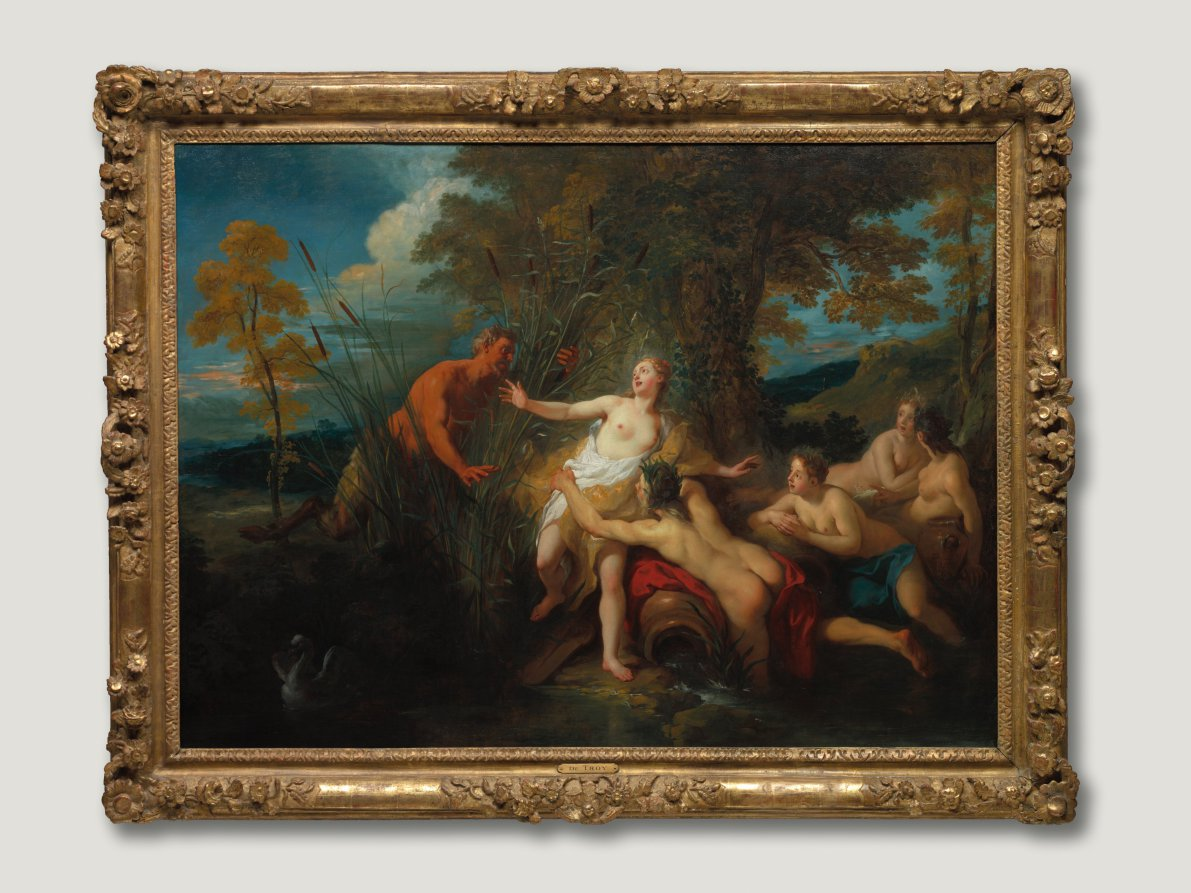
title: Pan and Syrinx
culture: France, 18th century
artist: Jean François de Troy (French, 1679–1752)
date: 1720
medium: oil on canvas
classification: Painting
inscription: Signed lower center: "De Troy 1720"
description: Subjects drawn from classical mythology posed a challenge for painters: they demanded skill in depicting the human body in complex poses, as well as knowledge of ancient texts and an ability to interpret them imaginatively. Jean François de Troy’s rich colors and voluptuous figure types were ideal for depicting the sorts of mythological subjects favored by his elite patrons, which generally focused on themes of love. In a myth recounted in the Roman poet Ovid’s Metamorphoses, the nymph Syrinx fled from the lecherous advances of the god Pan. Trapped at the edge of a river, she begged for a way to escape, and the gods transformed her into reeds. Pan later gathered these reeds to form the pan pipes, the musical instrument forever associated with him.